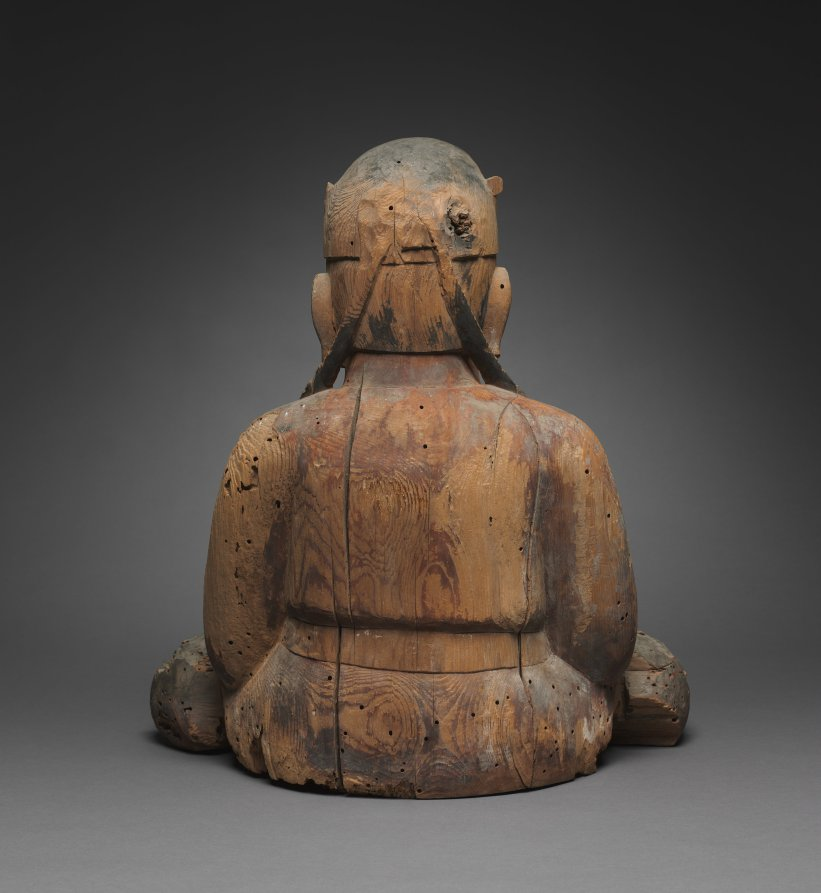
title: Shinto Deity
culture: Japan, Heian period (794–1185)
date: 900s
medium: wood, with traces of polychromy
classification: Sculpture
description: These sculptures represent kami, the name for deities associated with the Japanese religious tradition known as Shinto. They are said to have originally been created for the Usa Hachiman shrine in Oita on the island of Kyushu. Usa Hachiman Shrine houses four main kami: Hime Okami, who assists those engaged in agriculture and sea travel; the legendary 5th-century emperor Ojin deified as the kami Hachiman; Empress Jingu; and the kami of Mount Kawara, who aids copper miners. The identities of these two figures are unknown, but they belong to a larger group containing at least three other deities.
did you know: Traces of pigment on the surface of this sculpture indicate it was once painted.